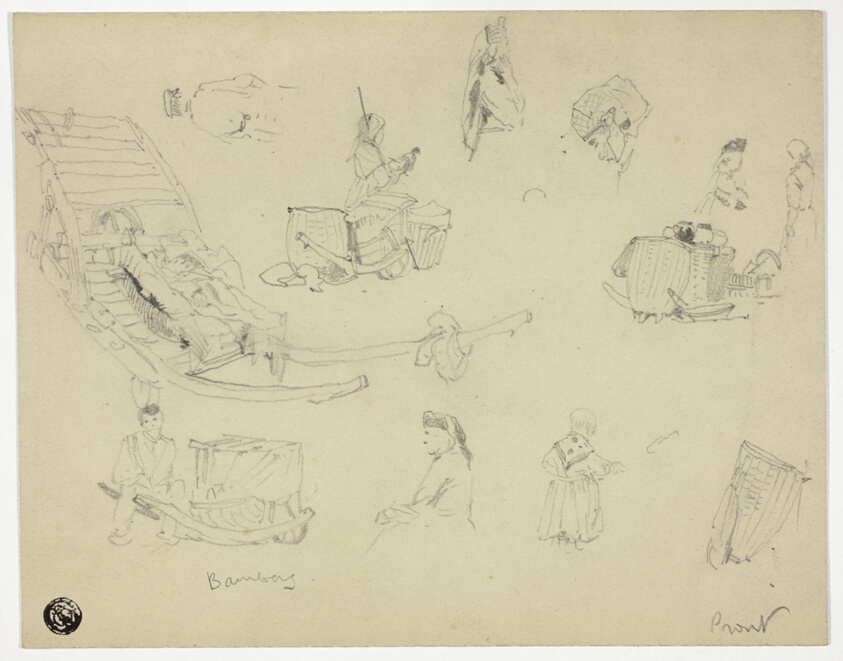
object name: Drawing and Watercolor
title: Sketches of Figures, Sleds at Bambarg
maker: Samuel Prout (English, 1783-1852)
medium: Graphite on tan wove paper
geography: England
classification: graphite; drawings (visual works); prints and drawing